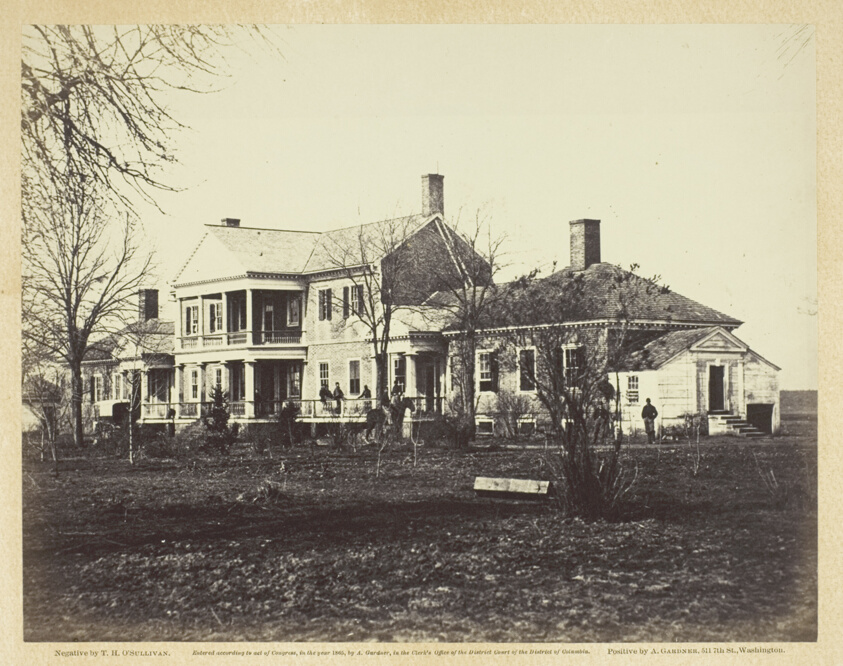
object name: Photograph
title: Lacey House, Falmouth, Virginia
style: 19th century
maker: Timothy O'Sullivan (American, born Ireland, 1840–1882)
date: December 1862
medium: Albumen print, pl. 29 from the album "Gardner's Photographic Sketch Book of the War, vol. 1" (1866)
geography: United States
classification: photograph; albumen silver print; photography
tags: Collected by Hugh Edwards, Gardner's Photographic Sketch Book